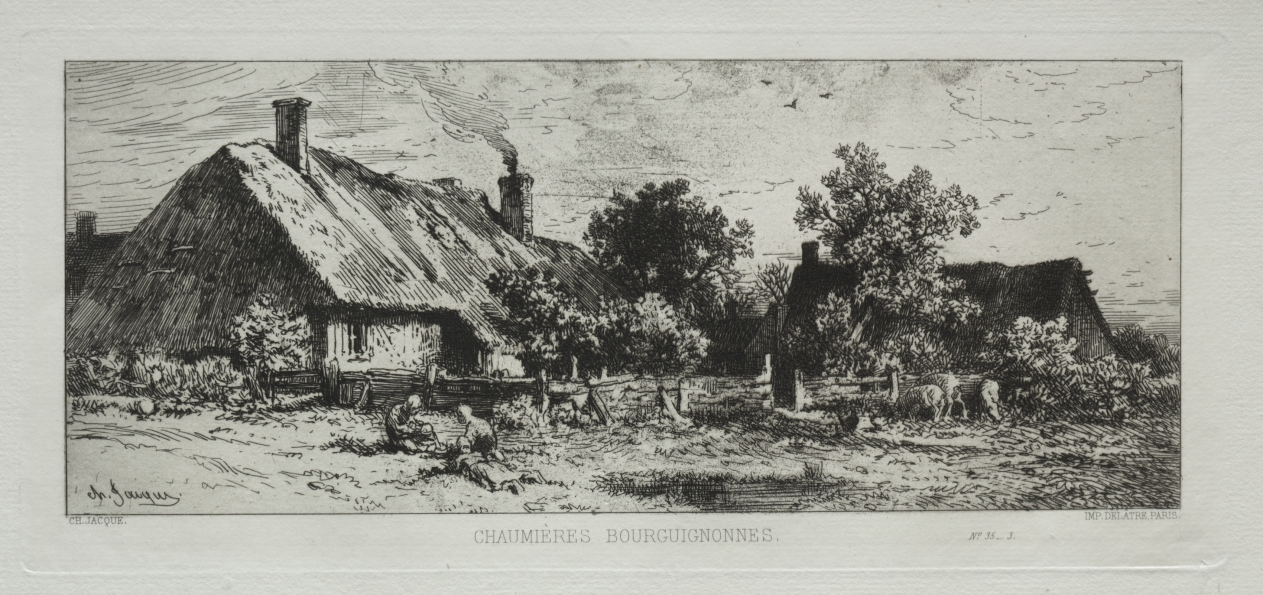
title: Burgundian Cottages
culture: France, 19th century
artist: Charles-Émile Jacque (French, 1813–1894)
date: 1866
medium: etching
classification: Print